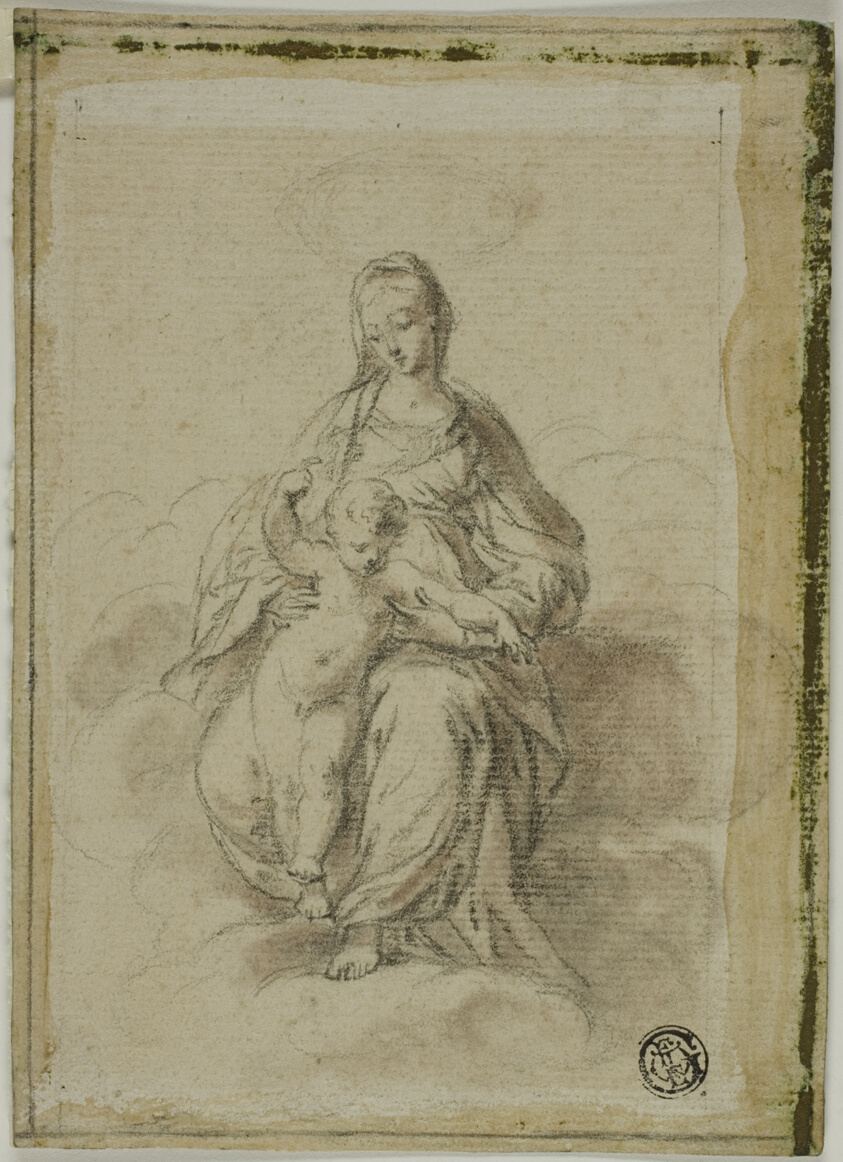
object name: Drawing and Watercolor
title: Virgin and Child Seated on Clouds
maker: Attributed to Count Antonio Maria Zanetti the Elder (Italian, 1679/80–1767); or after Francesco Mazzola, called Il Parmigianino (Italian, 1503-1540)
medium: Black chalk, with brush and brown wash, on ivory laid paper, partially laid down on blue wove paper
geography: Italy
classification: chalk and wash; drawings (visual works); prints and drawing